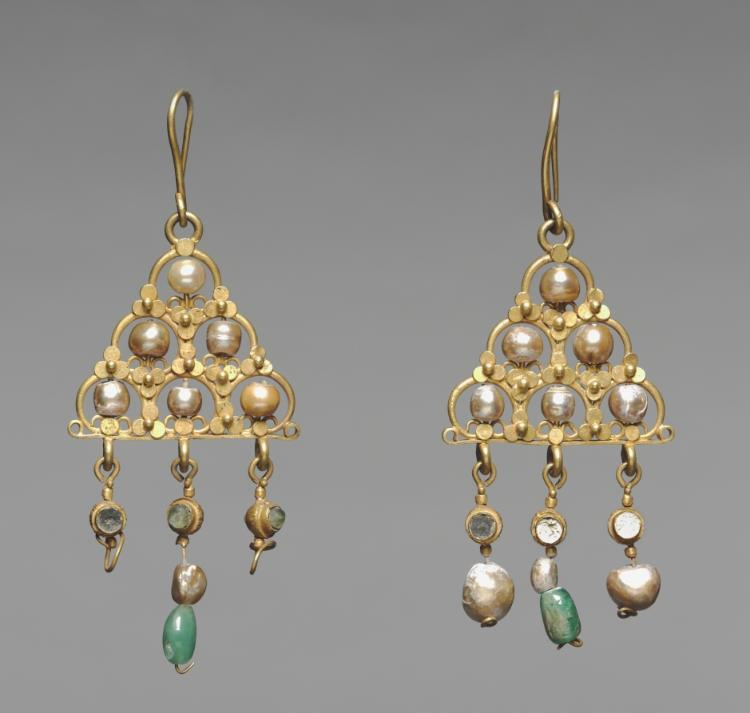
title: Earring (one of a pair)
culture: Byzantium, early Byzantine period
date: 600s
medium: gold, pearls, glass, and emeralds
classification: Jewelry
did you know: This piece of jewelry was worn by a woman in the fashionable courts of Byzantium. Decorated with pearls, glass, and emeralds, these gold earrings are delicate, yet eye-catching. Do you think these chandelier-style earrings would be fashionable today?